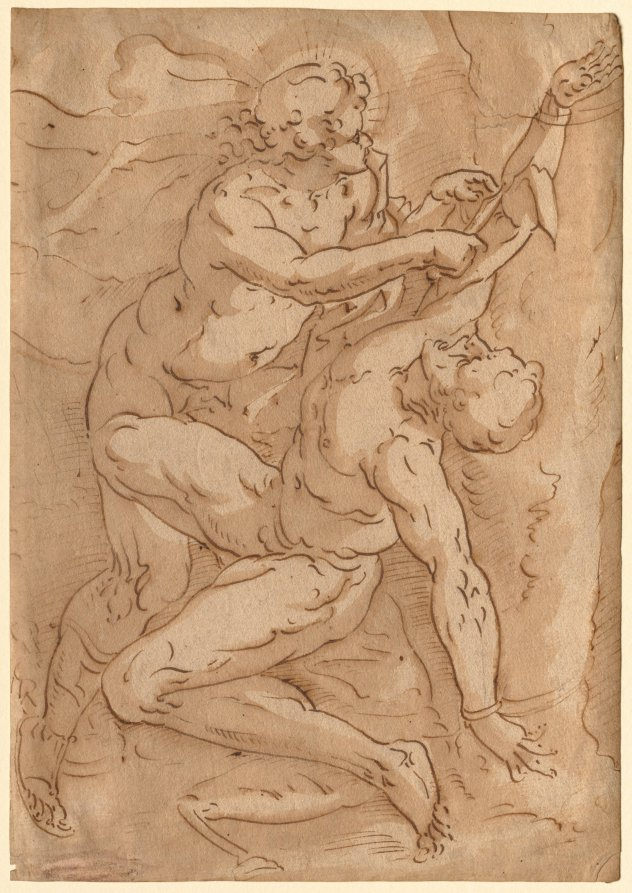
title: Apollo Flaying Marsyas (recto)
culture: Germany (or Netherlands), 16th century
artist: Anonymous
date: 1500s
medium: pen and brown ink and brown wash over black chalk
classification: Drawing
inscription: VERSO, upper center, in brown ink: Apollo chi scortica Marzia ; center, in graphite: 19